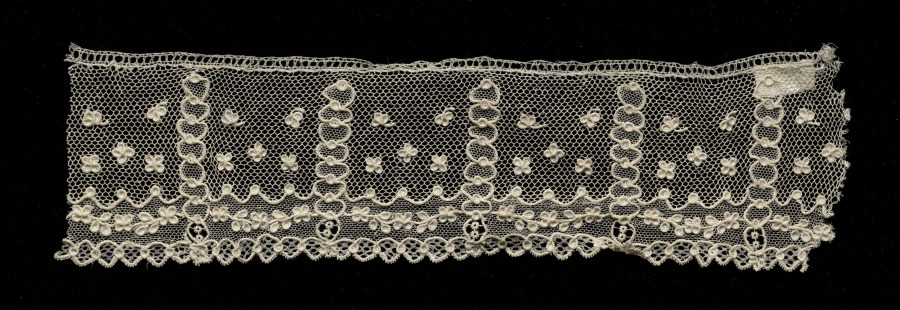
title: Lace Edging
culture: France, Alençon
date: 1700s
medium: Linen: needle lace (Point d'Alençon)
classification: Lace